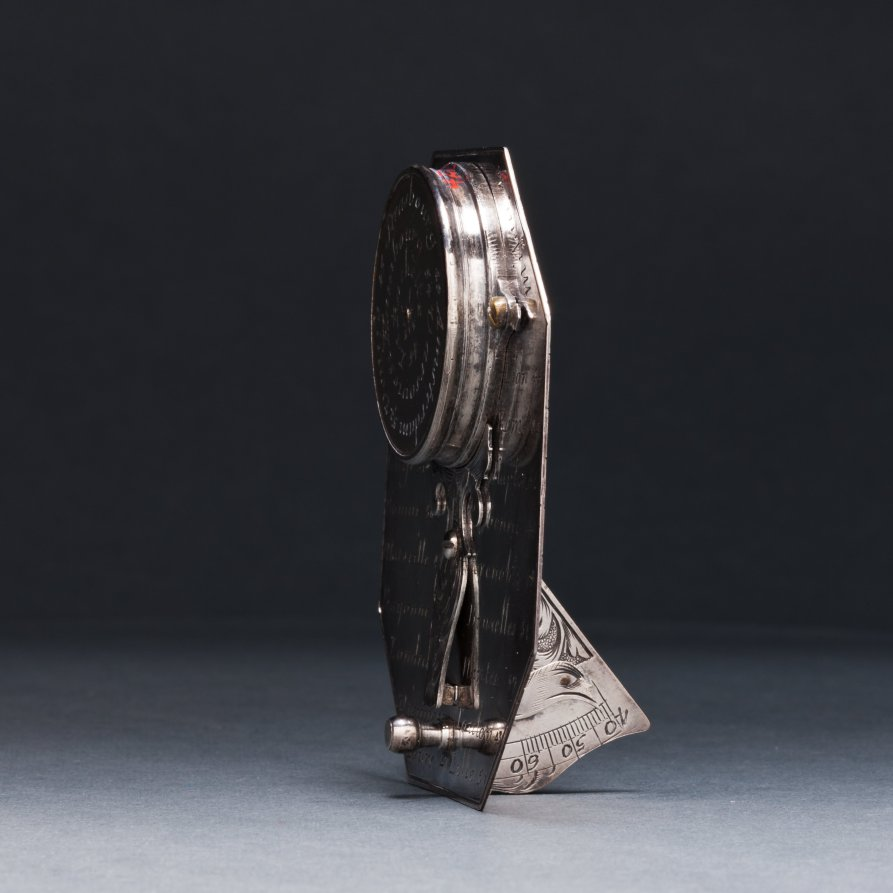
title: Butterfield Sundial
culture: France, 18th century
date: 1700s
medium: silver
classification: Silver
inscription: [Engraved signature above the compass in ribbon band]: "N. BION A Paris"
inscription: [Engraved on the face of the sundial]: “Pour 55° 4-5-6-7-8-9-10-11 50° IIII-V-VI-VII-VIII-IX-X-XI 45° 5-6-7-8-9-10-11 40° -VI-VII-VIII-IX-X-XI'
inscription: [Engraved on the other side]: "Pour 55° -8-7-6-5-4-3-2-1-0 50°-VIII-VII-VI-V-IIII-III-II-I 45°-8-7-6-5-4-3-2-1 40°-VII-VI-V-IIII-III-II-I"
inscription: [Engraved around the compass]: “NORD-OUEST-SUD-EST”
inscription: [Engraved on the back of the sundial]: “Turin 44 Milan 46 Paris 49 Lion 46 Metz 49 Rome 42 Liege 51 Naples 44 Namur 50 Gennes 44 Marseille 43 Grenoble 45 Bayonne 43 Bruxelle 51 Londres 52 Nantes 47 Vienne 48 Toulon 43 Tours 47 Lille 51”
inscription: [Engraved around the back of the compass]: “Venise 45 Strasbourg 49 Amsterdam 52 Hambourg 54 Varsovie 52 La Rochelle 46”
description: Butterfield-type sundials are characterized by their adjustable gnomons, metal flaps that cast a shadow on the dial’s face to indicate the hour, and geographical indices. This sundial has a scale adjustable between latitudes of 40° to 60° north. The latitudes of 26 European towns are engraved on its back for quick reference. With an intricately engraved silver face, it would have functioned as a fashionable traveler’s accessory.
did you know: Butterfield-style sundials were named after Micheal Butterfield, an English scientific and mathematical instrument maker who worked in Paris between 1674 and 1724.